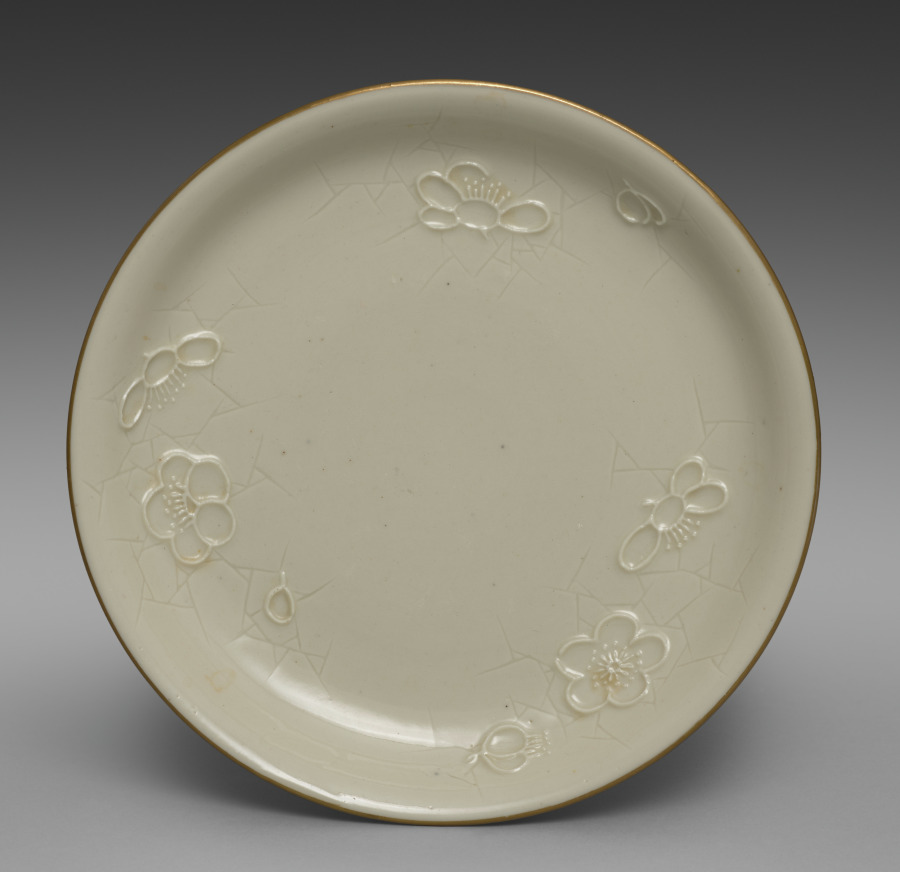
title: Medium-sized Dish from Dining Set with Plum Blossoms and Cracked-Ice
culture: Japan, Meiji period (1868–1912)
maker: Seifū Yohei II (Japanese, 1844–1878)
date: c. 1875–78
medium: Porcelain with molded designs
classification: Ceramic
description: Each item in this set has a delicate low-relief design of flowering plum branches over scattered, intersecting lines meant to resemble the cracked-ice surface of a frozen body of water and is signed on the base in gold pigment. While Yohei II produced many fine works in underglaze blue, like those produced by Kiyomizu Shichibei, he also made works in quite different styles later in his career, from the early 1870 s. In 1873, he was appointed purveyor to the Industrial Center of Kyoto Prefecture, a designation associated with Kyoto’s efforts to reach an international market through the port of Kobe; and from 1875 until his death, he was involved in national-level projects to present Japanese ceramics across the world. It was during this period that Yohei III was apprenticed to Yohei II, and it has been suggested that this set may in fact be an early example of Yohei III’s work, which he signed with his teacher’s name. Decorated with flowers resembling Japanese textile motifs, the set calls to mind the design of Yohei II’s pair of vases with plum blossoms in the Victoria and Albert Museum. Here, the elaborate trees created for a formal public exhibition setting have been translated into the approachable blossoms of the genteel domestic environment. While the designs are consistent across the pieces, each raised flower petal and pistil and each incised line in the ice was done by hand, so the cups, bowls, and dishes are similar yet unique. The bottoms of two boxes once identified the set’s owner, but the information has been deliberately obscured with black ink. However, inscriptions still visible appear to indicate two occasions, once at the end of July 1886 , and once again in June 1916 , when parts of the set were requested from Hokura in Niigata Prefecture. The location corresponds to a neighborhood in the present-day city of Jōetsu. The surname Tsuji 辻 also appears on a paper tag affixed to one of the box cloths. Future research may possibly reveal more about their provenance. A vase by Yohei III in a private collection combines the formal grandeur of the Yohei II vases in the Victoria and Albert Museum with the gentler design of this dining set, placing flowering plum trees against soft, scalloped-edge clouds resembling those in golden screens.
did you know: The dining wares have a creamy white coloration that the four boxes containing them identify as Korean in style.